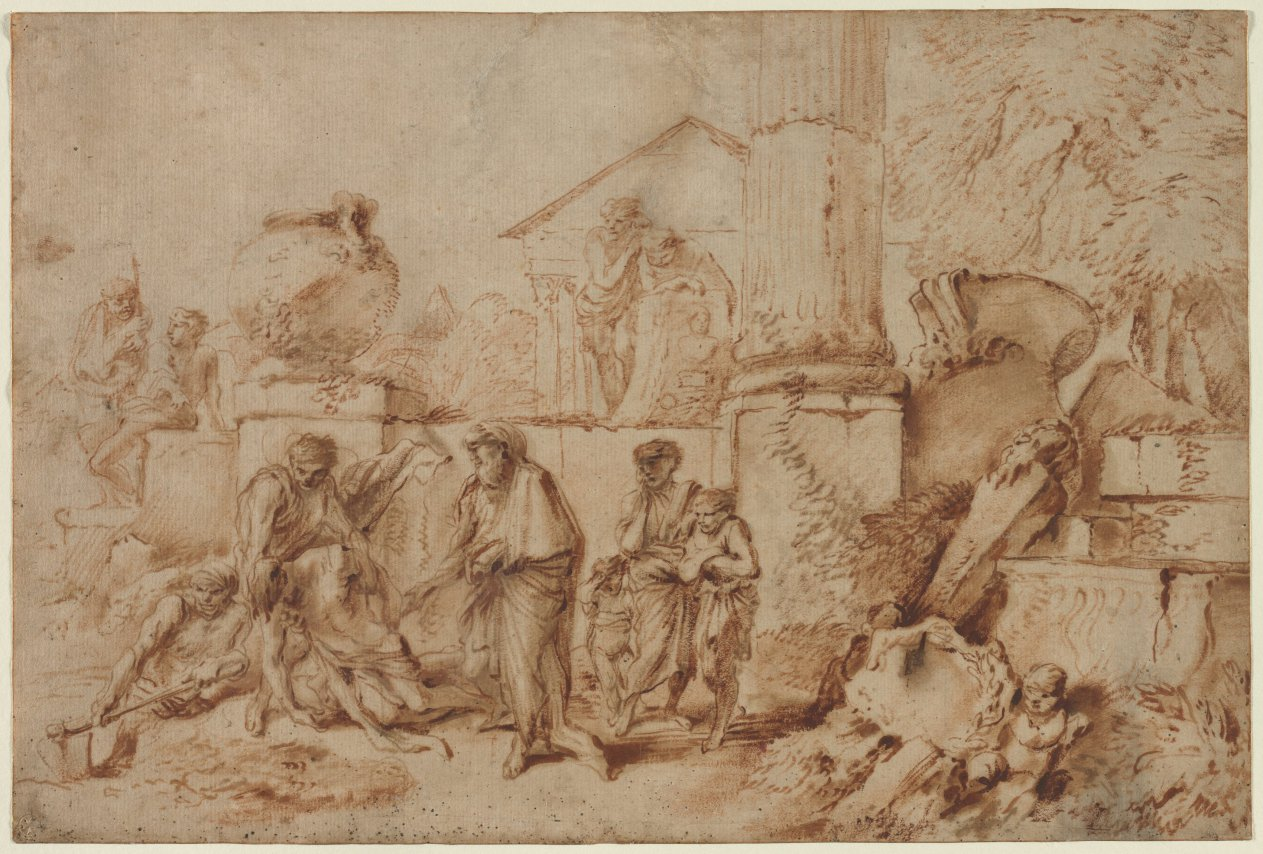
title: Tobit Burying the Dead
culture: Italy, 17th century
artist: Giovanni Benedetto Castiglione (Italian, 1609–1664)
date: 1640s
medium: oil and dark red pigment with oil and brown pigment; framing lines in gold paint over oil and dark red pigment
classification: Drawing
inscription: SECONDARY SUPPORT (now removed), lower right, in black ink: 765 ; lower right, in graphite: A 5077; VERSO OF SECONDARY SUPPORT (now removed), in graphite: Benedetto Castiglione / A 5077 [sideways] ; in graphite: [o?] [sideways]